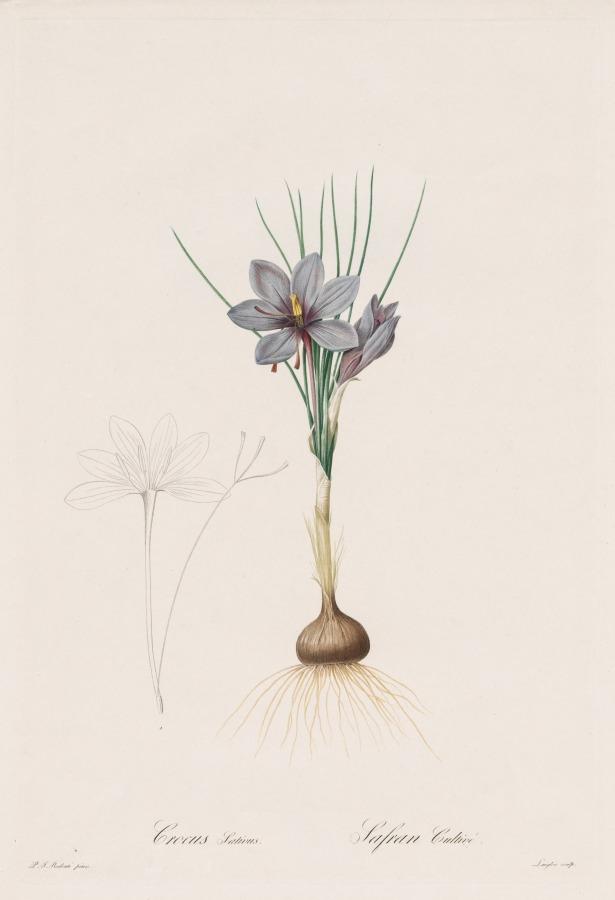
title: Les Liliacées: Crocus Sativus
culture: France, 19th century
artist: Henri Joseph Redouté (French, 1766–1853)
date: 1802–1816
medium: stipple and line engraving, with hand coloring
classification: Print